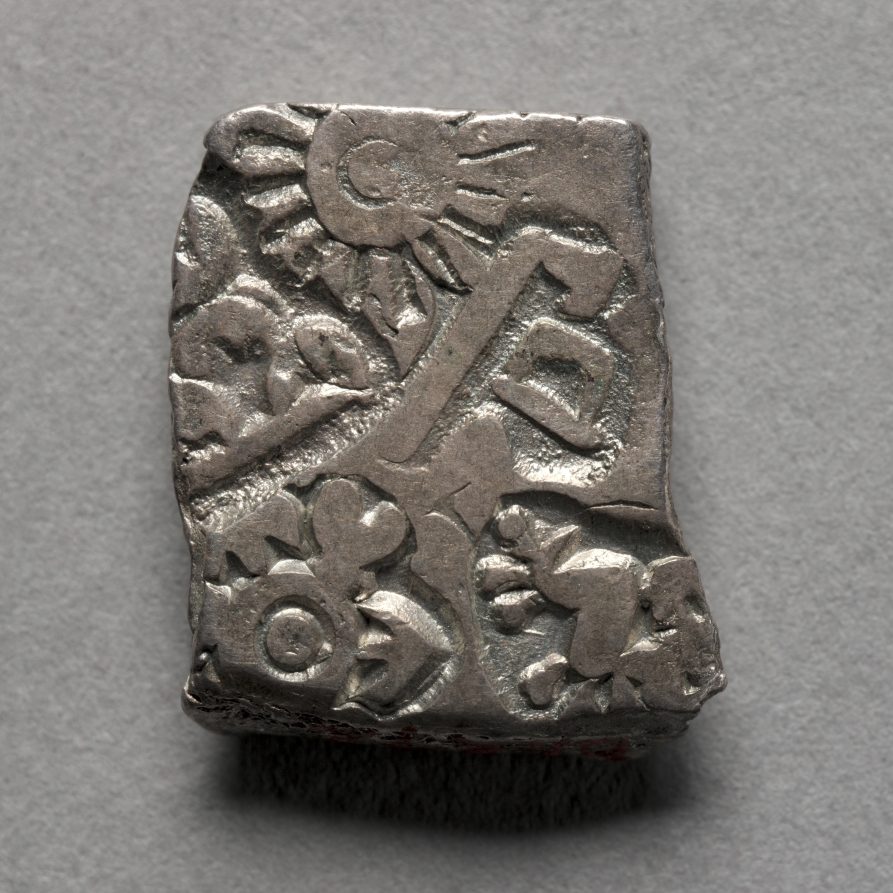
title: Punch-Marked Coin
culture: India, Rajasthan, Maurya period (322–185 BCE)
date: 400–300 BCE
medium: silver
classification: Coins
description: Indigenous Indian coinage was cut to weight from sheets of silver or copper and punch-marked, instead of die-cast. Each punch-marked coin had a unique combination of symbols.